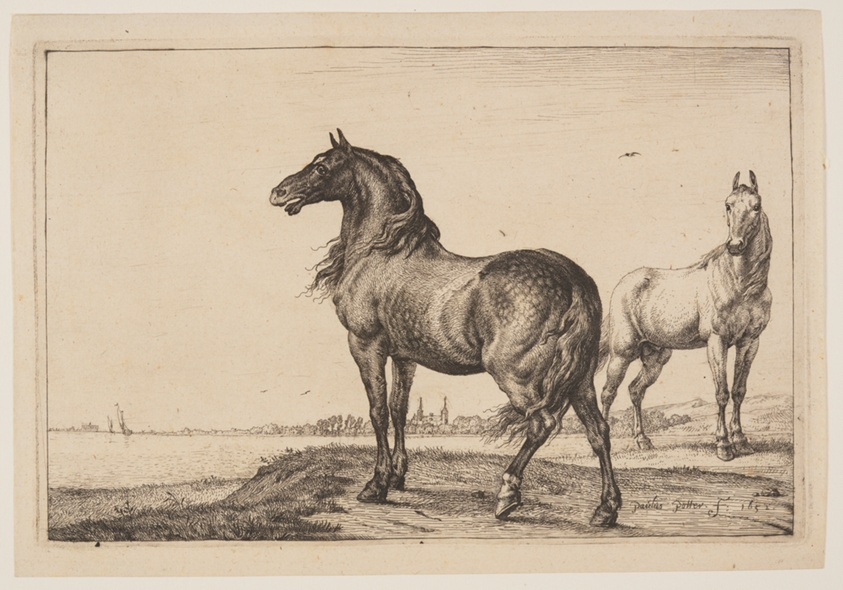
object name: Print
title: The Cropped Horse, from Series of Horses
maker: Paulus Potter (Dutch, 1625–1654)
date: 1652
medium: Etching on ivory laid paper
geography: Netherlands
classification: print; paper; prints and drawing; etching